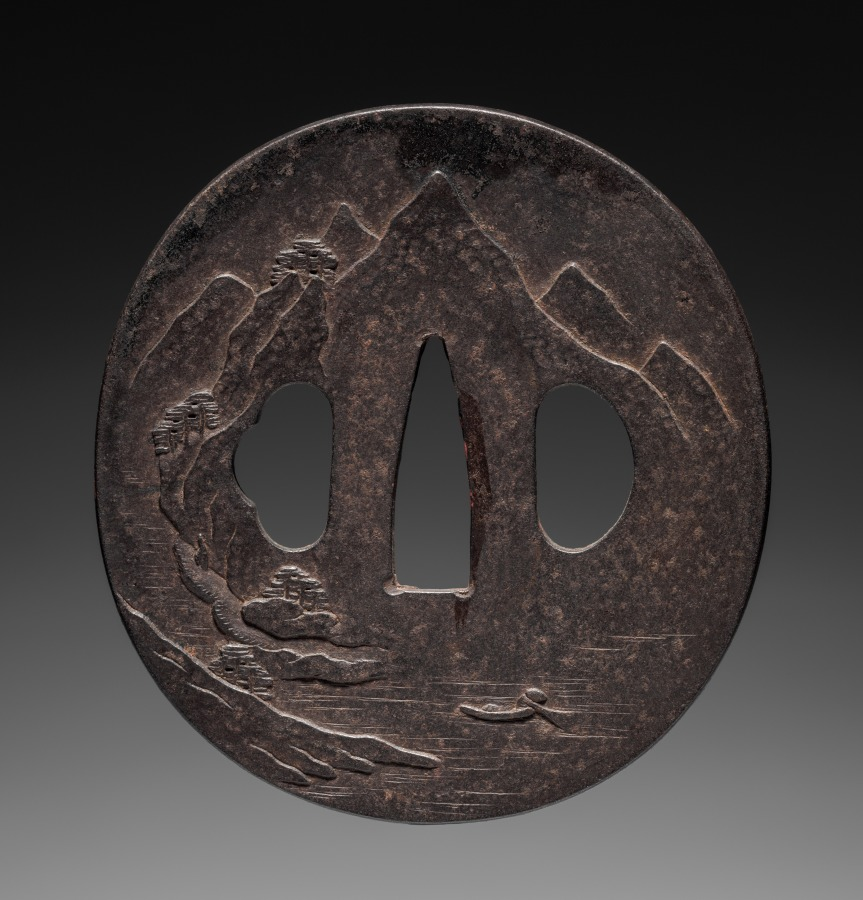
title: Sword Guard (Tsuba) with Chinese Landscape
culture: Japan, Edo period (1615–1868)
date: mid-1700s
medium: iron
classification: Arms and Armor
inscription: signed: 長州萩住友久作